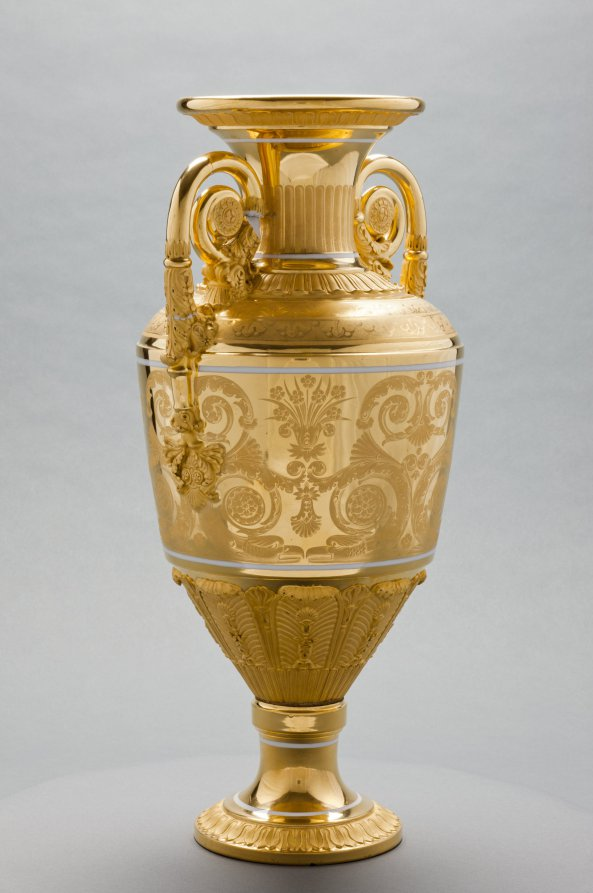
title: Vase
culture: Russia, St. Petersburg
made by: St. Petersburg Imperial Porcelain Factory (Russian)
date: c. 1820–1830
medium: gilt porcelain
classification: Ceramic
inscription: inscribed: "Moreau" in gold near lip.